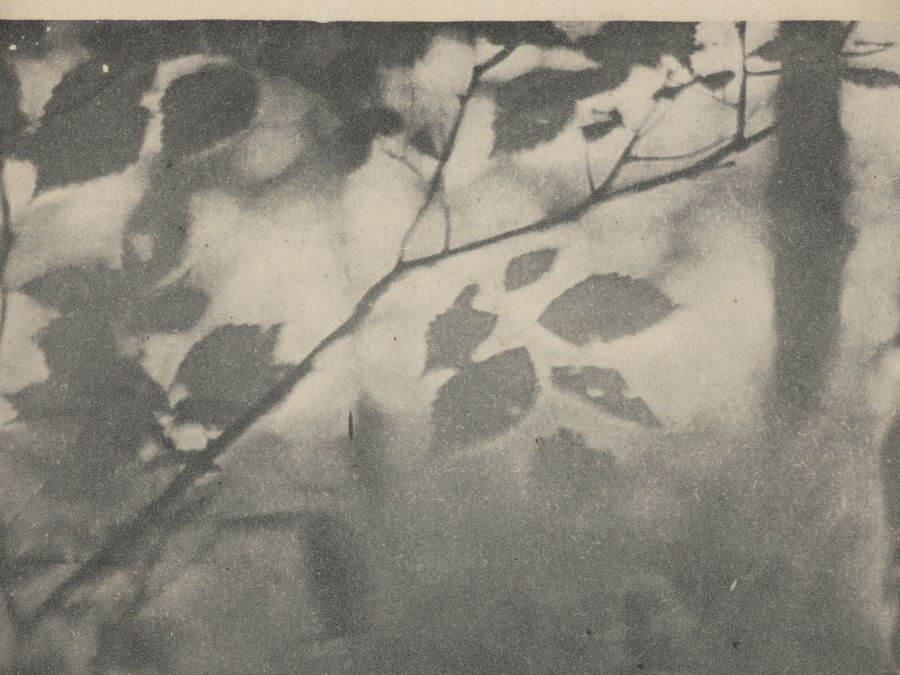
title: The Edge of the Wood - Evening (Letitia Felix)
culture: America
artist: Clarence H. White (American, 1871–1925)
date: 1900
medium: photogravure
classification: Photograph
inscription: Written in pencil on recto: "Clarence H. White [signed] '00"; in pencil on verso: " 'The Edge of the Wood-Evening'- / Clarence H. White"; in pen on verso: "Letitia Felix"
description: Clarence H. White experimented with an array of artistic media that blurred the lines between photography, drawing, and printmaking. Here are two examples of that experimentation: a platinum print on the left and a photogravure on the right. White was likely drawn to both processes for their broad tonal range and interaction of image and paper. To create platinum prints, a light-sensitive liquid emulsion is applied to and absorbed by the paper. The image forms within the paper’s fibers, resulting in a matte appearance. Because photogravures are printed like an etching, the image is formed with ink impressed onto the paper’s surface.